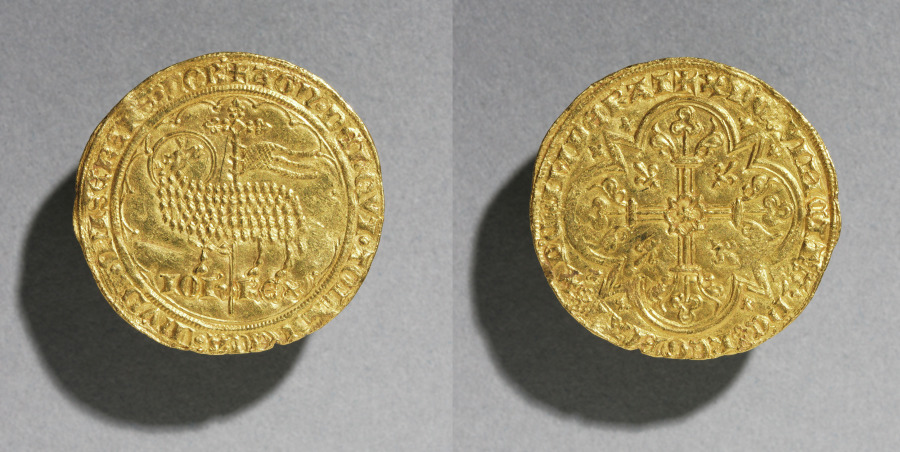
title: Mouton d'Or of King Jean le Bon of France, 1350-1364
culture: France, Gothic period, 14th century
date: 1350–1364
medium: gold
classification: Coins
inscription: haloed Paschal Lamb, holding a staff with a floriate cross and framed with a near-circle of single arches and inscribed: AGN.DEI.QVI.TOLL.PECA.MVDI.MISERERE.NOB; inscription directly below the Pascal lamb: IOH.REX.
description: Because this gold coin represents the Paschal Lamb, a symbol of Christ, on one of its faces, it is known as a "Golden Sheep"--Mouton d'Or in French.